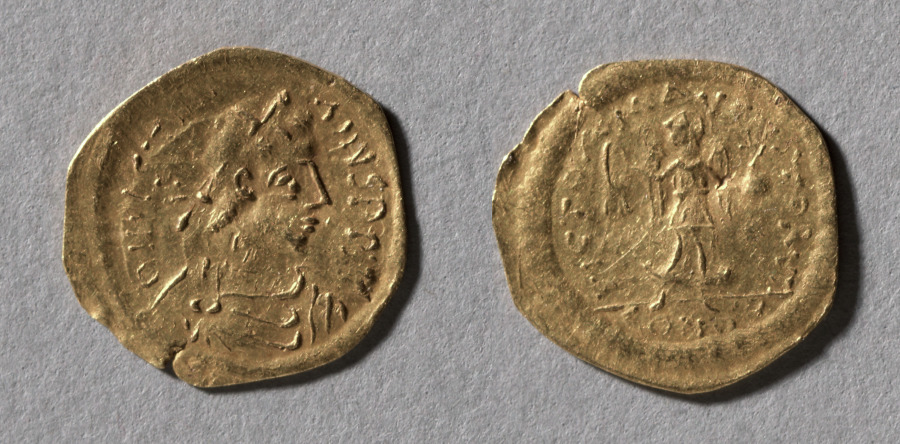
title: Half Tremissis of Justinian I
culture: Byzantinium, Constantinople, Byzantine period, 6th century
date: 527–565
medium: gold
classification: Coins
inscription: (Avers): DNIVSTINI ANVSPPA[VC] (Revers): VICTORIAAVC[VS]TORVM and CONO[B]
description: This solidus was issued during the reign of Emperor Justin II, successor of Justinian the Great.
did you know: Tremissis means "a third of a unit," referring to this coin's value in ancient Greece.